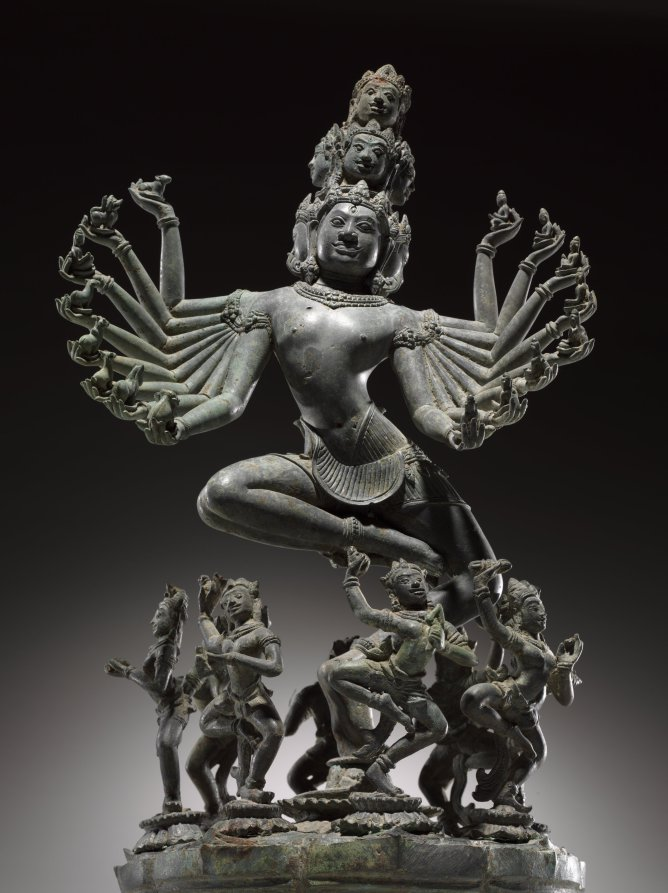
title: Hevajra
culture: Northeastern Thailand, former kingdom of Angkor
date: c. 1200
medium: Bronze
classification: Sculpture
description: Hevajra was an important figure signaling the practice of Buddhist rituals. King Jayavarman VII placed particular emphasis on Hevajra during consecration rituals and set up a colossal stone sculpture of dancing Hevajra at the east gate of his fortified city in the Khmer capital at Angkor. In the Cambodia of Jayavarman VII, tantric Buddhism became public and widespread, practiced together with other more mainstream forms of Buddhism, Hinduism, and ancestor worship. The iconography of Hevajra is described in detail in a text that bears his name, the Hevajra-tantra, first composed in India probably in the 800s. Hevajra has eight heads, sixteen arms, and four legs. His left hands hold images of Indic gods; wealth, death, sun, moon, fire, wind, water, and earth. In his right hands are animals: bull, lion, human, cat, camel, sheep, horse, and elephant. They all sit in skull cups, objects also used in tantric rituals. He dances on a corpse that embodies ignorance and is surrounded by eight yoginis who dance triumphantly in a ring around him. Yoginis functioned as intercessors between human practitioners and enlightened beings. Many bronze images of Hevajra were made during the reign of Jayavarman VII, but few survive in as pristine condition as this example. According to scientific analysis and curatorial reports, this sculpture survived in a clay vessel submerged in water, which accounts for its high tin content and unusual gray patina. Samples from the clay core reveal the presence of the mineral feldspar, a characteristic of clay from the Isaan plateau, on the other side of the mountain range not far from Banteay Chhmar, in present-day Thailand.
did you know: Hevajra, the Tantric Buddhist deity who personifies Enlightenment, dances vigorously to symbolize the human soul's liberation from the snare of existence.